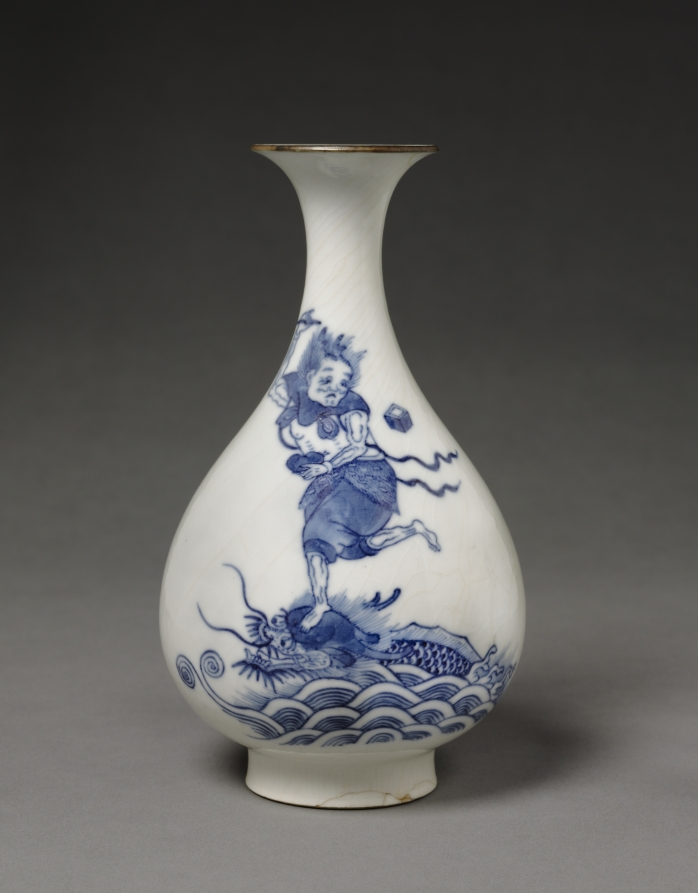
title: Pear-Shaped Vase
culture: China, Jiangxi province, Jingdezhen kilns, Qing dynasty (1644-1911), Yongzheng reign (1723-35)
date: 1723–35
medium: porcelain with underglaze blue decoration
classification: Ceramic